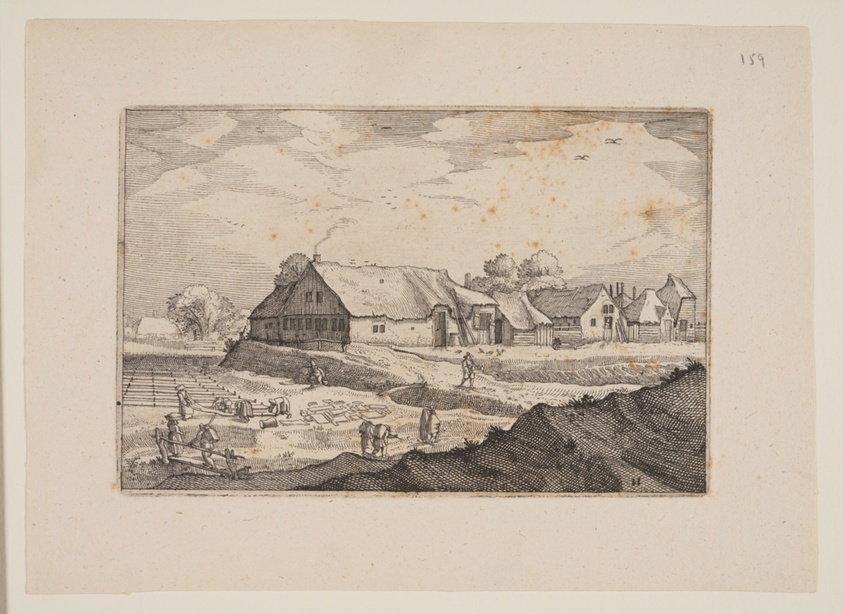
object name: Print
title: Farms and Bleaching-Fields, from Views in the Surroundings of Haarlem (Plaisante Plaetsen)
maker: Claes Jansz. Visscher (Netherlandish, c. 1550–c. 1612)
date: 1610/20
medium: Etching on ivory laid paper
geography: Netherlands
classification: print; paper; prints and drawing; etching